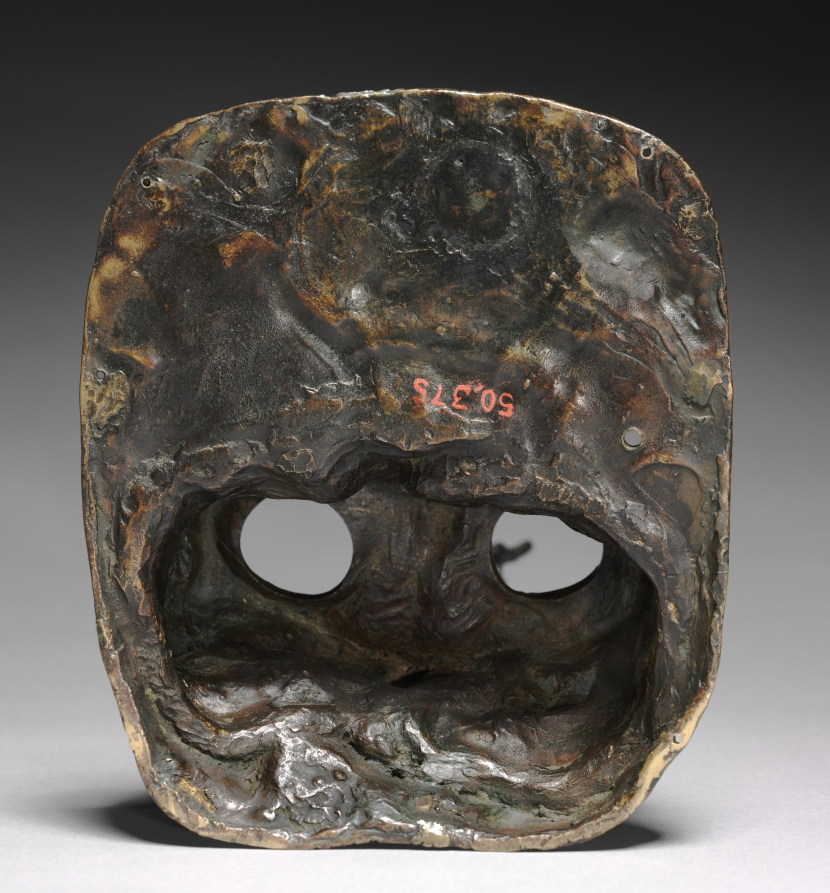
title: Base for a Satyr and Satyress Group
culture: Italy, possibly Padua, early 16th century or later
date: early 1500s or later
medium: bronze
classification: Sculpture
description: The pagan subject matter here was common in the 1500s and, with the pan pipes on the ground, indicates a scene of poetry and music. Long thought to be an ink stand, the two openings are now understood as possibly having housed a satyr and satyress.